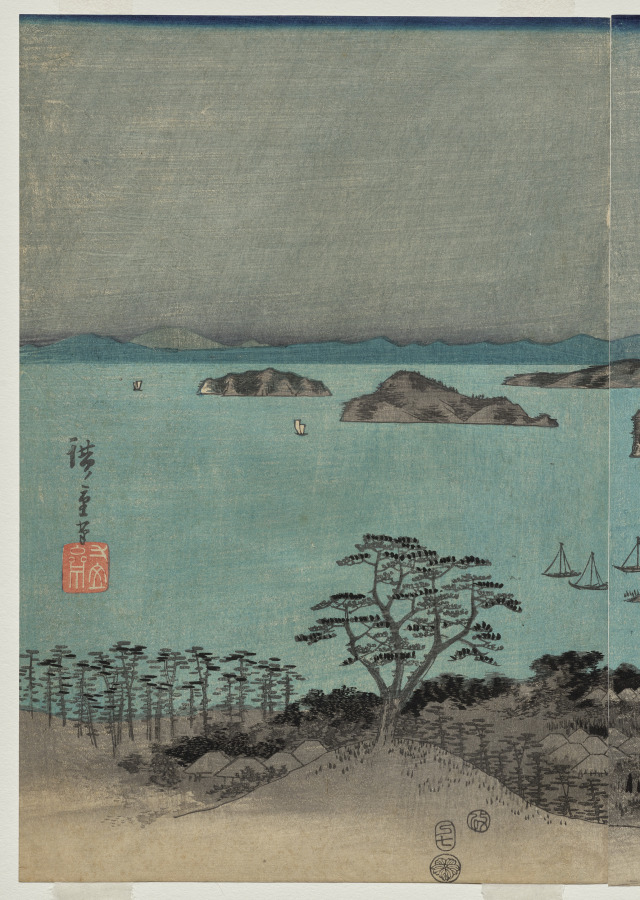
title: Evening View of the Eight Famous Places near Kanazawa Under Full Moon in Musashi Province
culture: Japan, Edo period (1615–1868)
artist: Utagawa Hiroshige (Japanese, 1797–1858)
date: 1857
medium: One of a triptych of color woodblock prints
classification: Print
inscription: Signature: Hiroshige hitsu Publisher: Okazawaya Taheiji (emblem) Censorship Seal: aratame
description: Late in his career, Hiroshige explored the poetic theme of setsugekka, “snow, moon, and flowers,” in a set of three triptychs. This panoramic scene shows the autumn moon over Kanazawa, near Tokyo. Hiroshige’s contemporaries would have recognized the coastline dotted with villages, fishing boats, and the distinctive double-arched bridge at the bottom right.